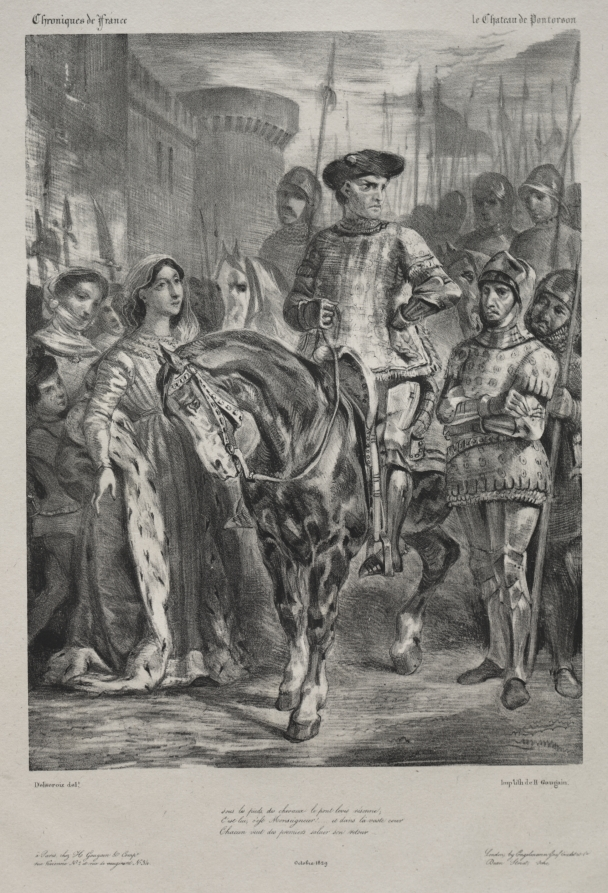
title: Duguesclin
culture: France, 19th century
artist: Eugène Delacroix (French, 1798–1863)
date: 1829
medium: lithograph with chine collé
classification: Print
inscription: upper margin, printed: Chroniques de France Le Chateau de Pontorson; lower margin, printed: Delacroix del. / Imp lith de H. Gaugain / à Paris chez H. Gaugain & Compe / rue Vivienne No. 2 et rue vaccginard No. 34 / London by Engelmann Graf Graf Coindet et Co. / Dean Street, Soho / sous les pieds des chevaux le pont levis résonne; / C'est lui, c'est Monseigneur!...et dans la vaste cour / Chacun veur des premiers saluer son retour / Octobre 1829